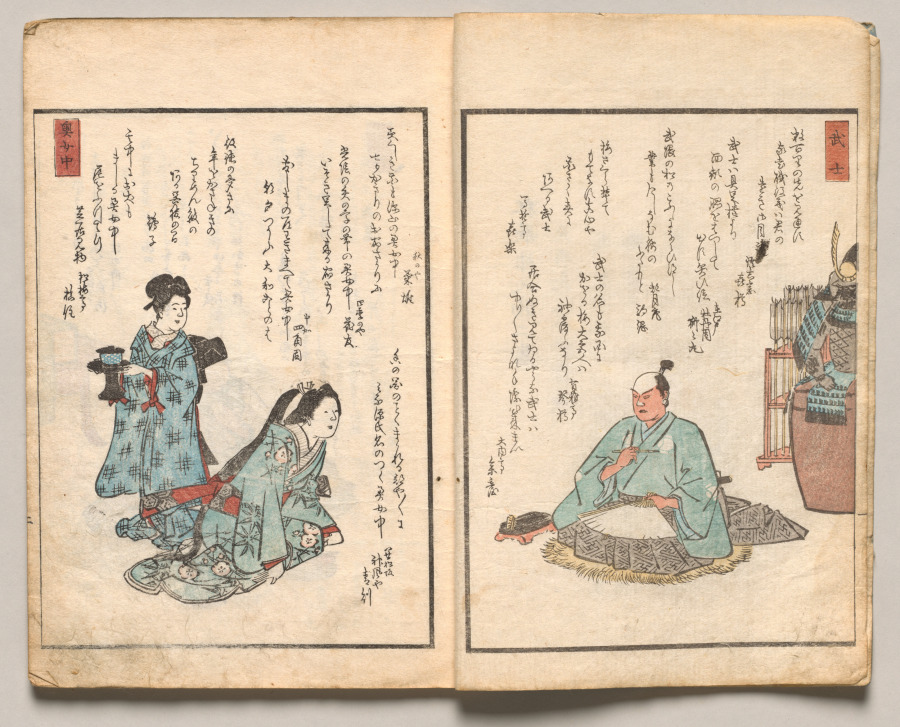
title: Spread Two from Volume Two of People of Japan in Light Verse (Kyōka)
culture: Japan, Edo period (1615–1868)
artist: Utagawa Hiroshige (Japanese, 1797–1858)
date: 1857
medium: Woodblock-printed book; ink and color on paper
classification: Bound Volume